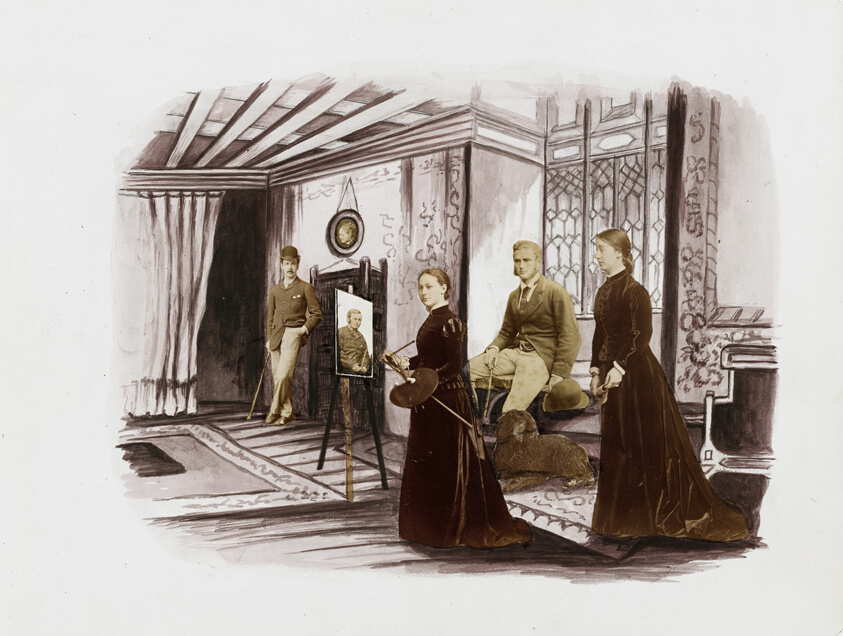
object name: Photograph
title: Untitled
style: 19th century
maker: Artist unknown; English, 19th century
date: c. 1875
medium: Photocollage (albumen prints with watercolor)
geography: United Kingdom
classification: mixed media/collage; photography; photograph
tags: portraits, portraits: multiple subjects, photography